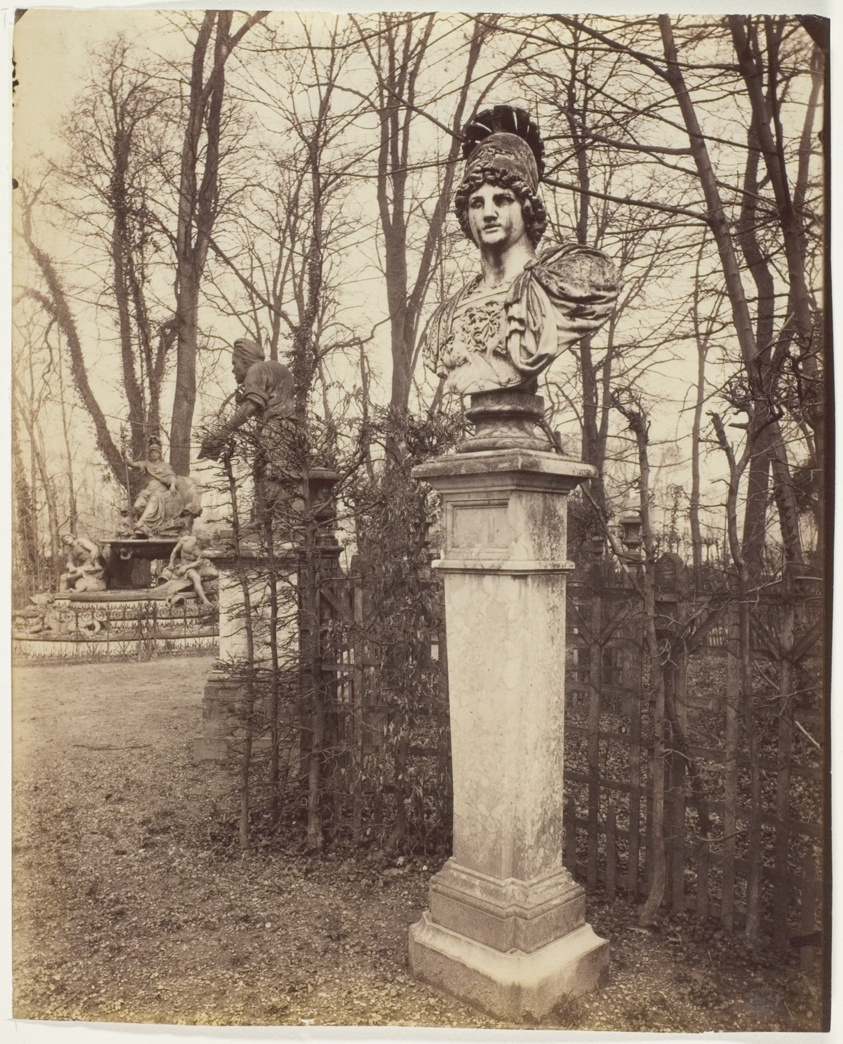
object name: Photograph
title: Versailles, Bosquet de l' Arc de Triomphe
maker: Jean-Eugène-Auguste Atget (French, 1857–1927)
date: 1903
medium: Albumen print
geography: France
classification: albumen silver print; photographic process; photography; photograph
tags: Collected by Hugh Edwards